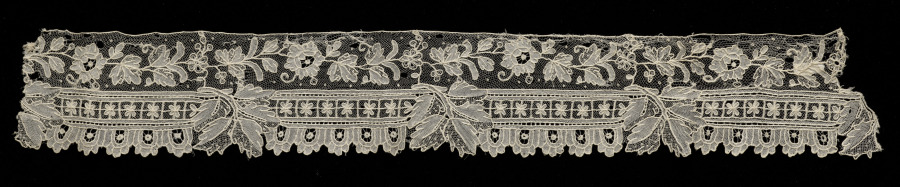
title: Lace Strip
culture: Belgium, Brussels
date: 1800s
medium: Needle lace (point de gaze)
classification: Lace